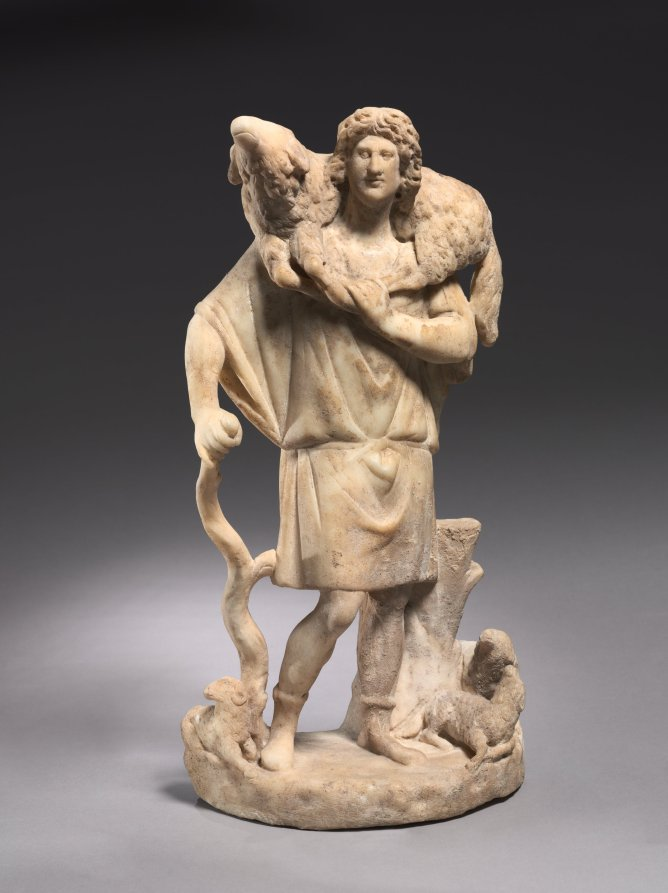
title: The Good Shepherd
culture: Anatolia, late Roman-early Christian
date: 280–90 CE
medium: marble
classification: Sculpture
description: Images of a youthful shepherd standing among his flock and carrying a sheep over his shoulders were popular with Romans of traditional faith as well as Christians living in the Late Roman Empire. Painted on the walls or the ceiling of a burial chamber or carved on a marble sarcophagus, this image might simply invoke the deceased’s hope for a peaceful afterlife spent in a pastoral setting. For Christians, this traditional Roman image took on a more specific meaning. It could be understood to refer to the passage in the Gospel according to John in which Christ said of himself: "I am the good shepherd. The good shepherd lays down his life for the sheep." (John 10:11). Allegedly found together with the Jonah statuettes, it is indeed likely that this figure represents Christ as the Good Shepherd.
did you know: This youthful shepherd appears serene while bearing a large sheep on his broad shoulders. He looks untaxed by this effort and his calm presence seems to put the small sheep at ease, as they frolic at his feet. Since this sculpture was found together with the four Jonah statuettes, it is likely this figure depicts Christ as the Good Shepherd.